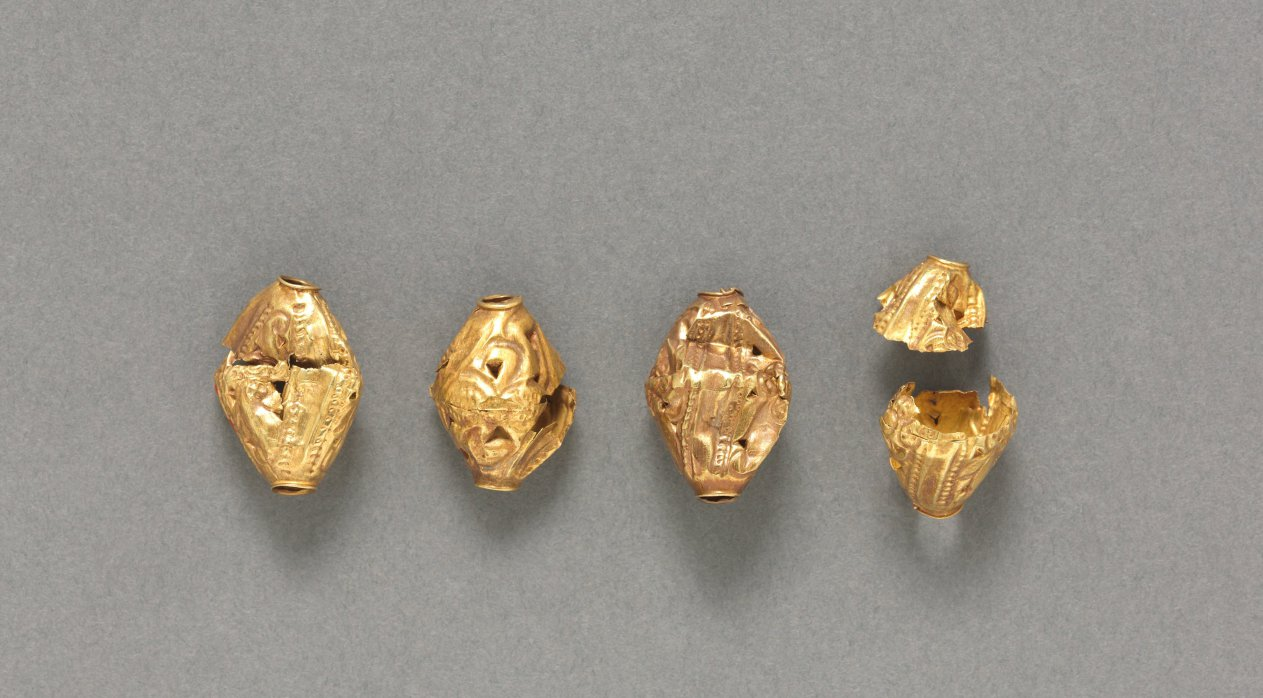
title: Beads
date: after 1519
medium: gold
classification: Jewelry